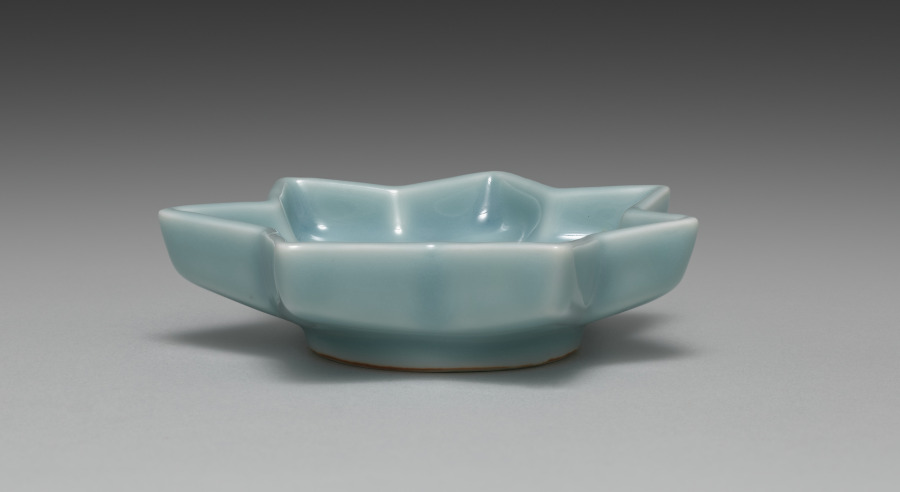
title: Saucer from Maple Leaf-Shaped Saucers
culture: Japan, Meiji period (1868–1912)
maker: Seifū Yohei III (Japanese, 1851–1914)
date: 1893–1914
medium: One of five dishes from a set of ten; porcelain with blue glaze and molded design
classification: Ceramic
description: These maple leaf–shaped saucers, like Yohei III's five shell saucers CMA 2022.188, have a long, horizontal box with a separate compartment for each piece. Now a set of five, these dishes were originally a set of ten, stored in two boxes of five each. From their housings, which accommodate differing numbers of objects, one can hypothesize that while some items created by the Seifu studio were intended to be acquired in larger sets, and thus were perhaps made to order, others, like these, may have been items to be purchased of the shelf in set quantities that allowed clients flexibility in scale. The box for these five saucers describes them as “heavenly blue[–glazed] porcelain” (tenseiji). The veins of the leaves are slightly raised in the clay so that the glaze pools around them and they stand out as white where the glaze thins. There are longer lines at the points of the leaves and shorter ones following the wall of each indentation so that the design has both a horizontal and a subtle vertical dimension.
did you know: These saucers shaped like maple leaves show Seifū Yohei III’s “heavenly blue glaze.”